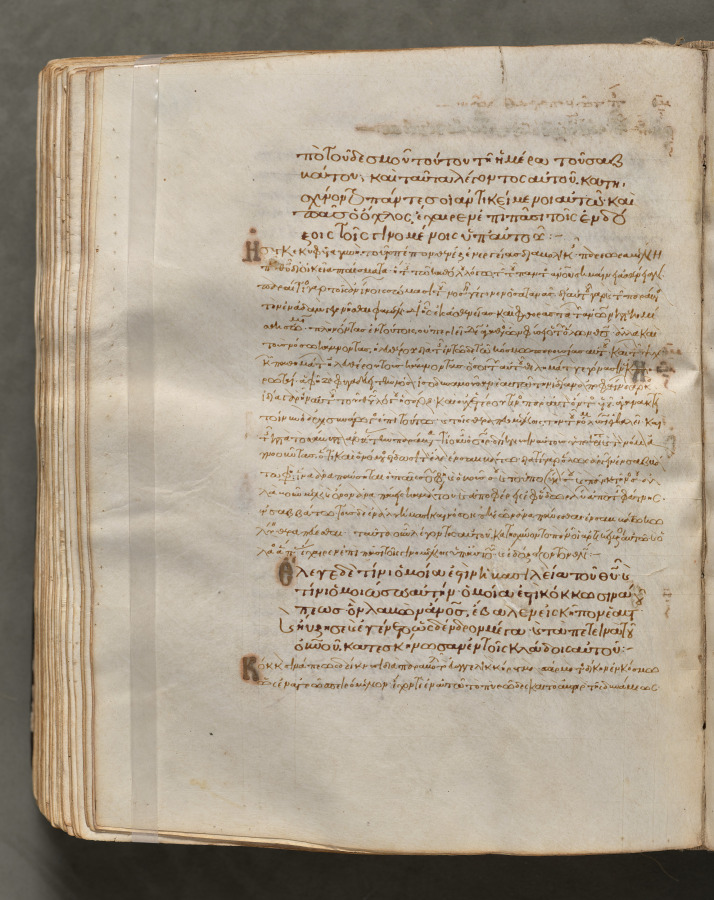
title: Text, folio 273 (verso), from a Gospel Book with Commentaries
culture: Byzantium, Constantinople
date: c. 1000–1100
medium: ink, tempera, and gold on vellum; leather binding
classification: Bound Volume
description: Each of the four gospels in this book opens on a page with brilliantly illuminated borders depicting the author of the text as well as birds—principally peacocks, symbols of the immortality of the soul—and fountains, representing the fountain of life and the salvation of the soul. This volume consists of 428 leaves with texts in Greek. Its level of sophistication suggests that it was probably written and decorated in a monastery in Constantinople.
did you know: Gospel books were carried in procession through Byzantine churches.